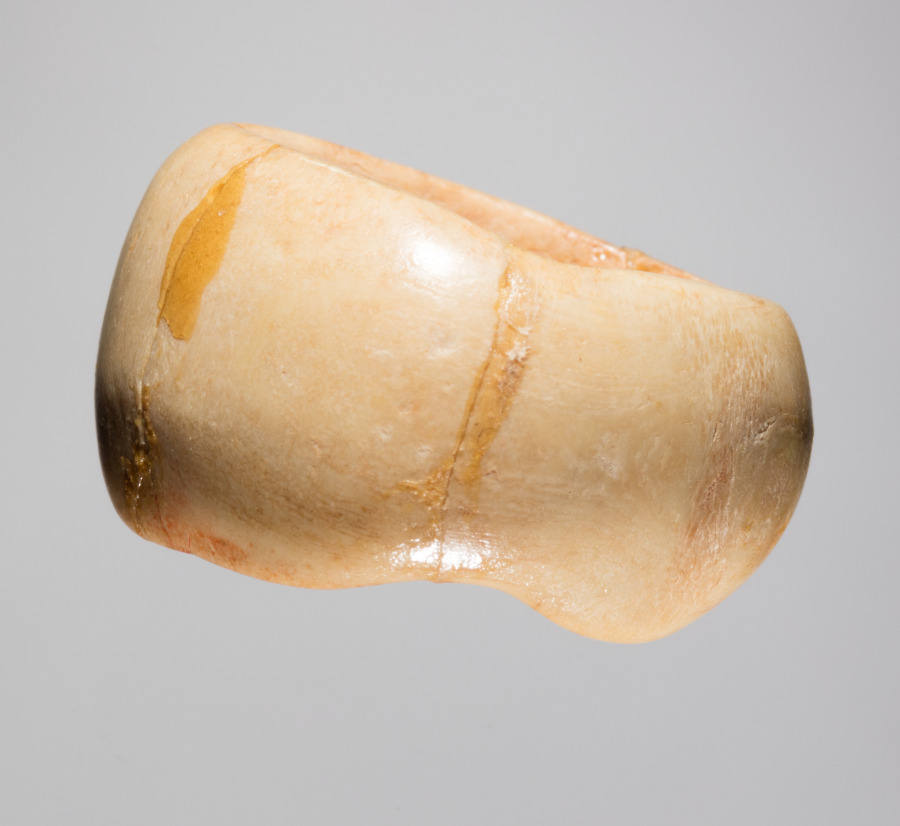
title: Ring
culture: Iran, early Islamic period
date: 700s - 900s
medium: bone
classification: Miscellaneous